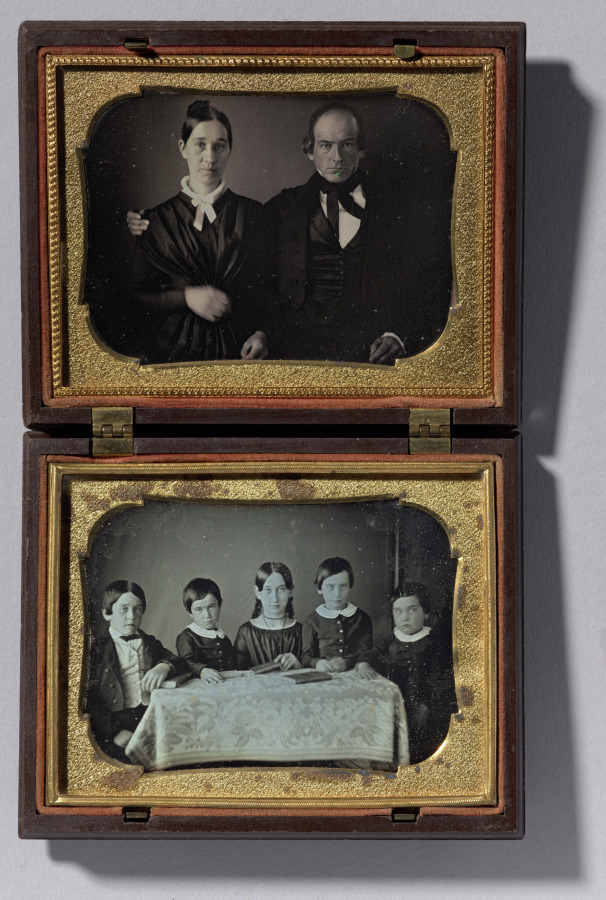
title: The Homework Table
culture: America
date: c. 1858–60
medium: daguerreotype, quarter plate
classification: Photograph